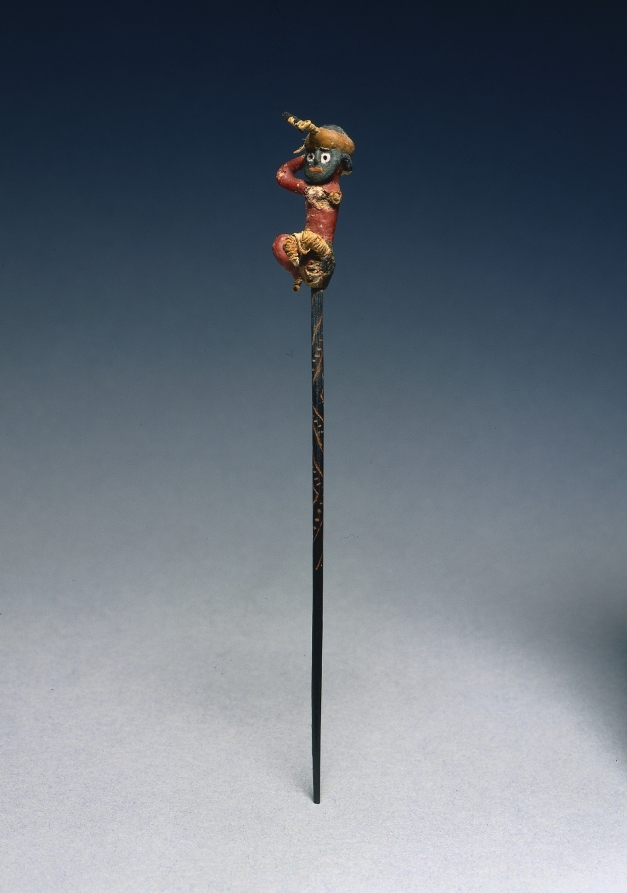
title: Pin with Yarn Figure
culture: Peru, South Coast, Nasca style?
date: c. 300 BCE–200 CE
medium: wood, yarn, paint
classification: Jewelry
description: Paracas headgear from mummy bundles sometimes incorporate human-hair wigs, wound with long headbands and slings. Ornamented with a diminutive kneeling figure, this pin may have been used like a hat pin to hold the wrappings in place. Although poorly preserved, this object illustrates the use of resin pigment on materials other than ceramics.